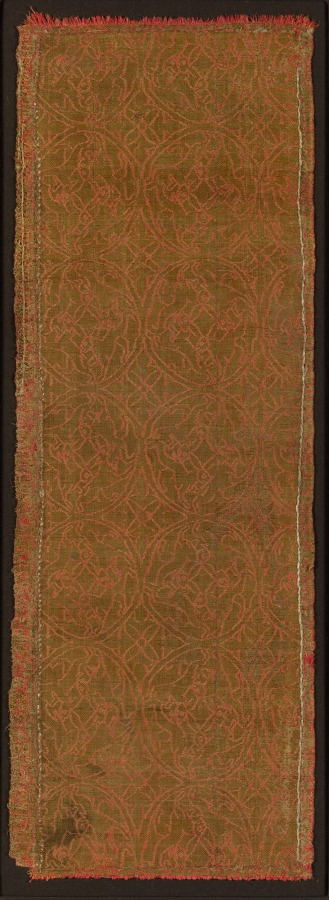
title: Cloth of Gold with Rabbit Wheels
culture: Eastern Iran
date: c. 1225–50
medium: Silk and gold thread: lampas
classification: Textile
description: Cloth of Gold with Rabbit Wheels Lampas; silk and gold thread Eastern Iranian world, about 1225-1260 The Cleveland Museum of Art, John L. Severance Fund 1993.140 (Cat. no. 45) The lavish amount of gold-used here for both the pattern and the background-reflects the extravagant taste of the Mongols. Known as "cloths of gold," such textiles were primarily woven for the official costumes of the Mongol court. Repeated roundels enclose four rabbits that share two pairs of ears and run in a circle. This motif, known as an animal wheel, is very ancient in Asia. Rabbits are commonly found on eastern Iranian metalwork dating from around 1200. Although the Mongol conquest of the Eastern Iranian world had taken place (1220-22), traditional silk patterns continued to be produced through the mid-1200s.